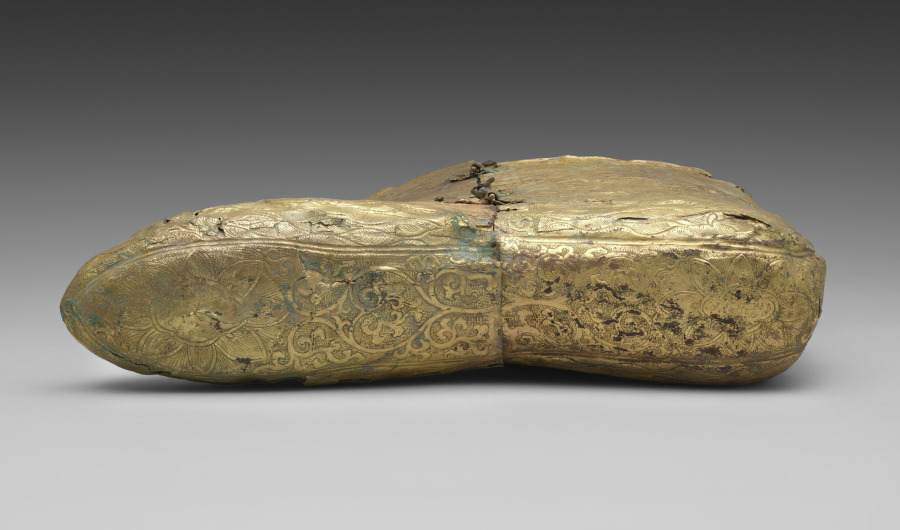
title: Gilt-bronze Boot, One of a Pair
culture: Northern China, Liao dynasty (907-1125)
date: 907–1125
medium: Gilt-bronze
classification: Metalwork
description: Bronze and silver-gilt boots, modeled after textile and leather boots, were found in Liao tombs. A pair of silver-gilt boots (dated 1018 or earlier) with phoenix motifs and cloud scrolls, were excavated from the tomb of Princess Chen and Xiao Shaoju in Inner Mongolia at Qinglongshan town in Naiman Banner; the couple’s faces were covered with gold masks. This gilt-bronze boot shows rising dragons chasing pearls and may have been made for a male tomb occupant.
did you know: The boot's dragon motif suggests that the wearer was a male princely member of the ruling family.